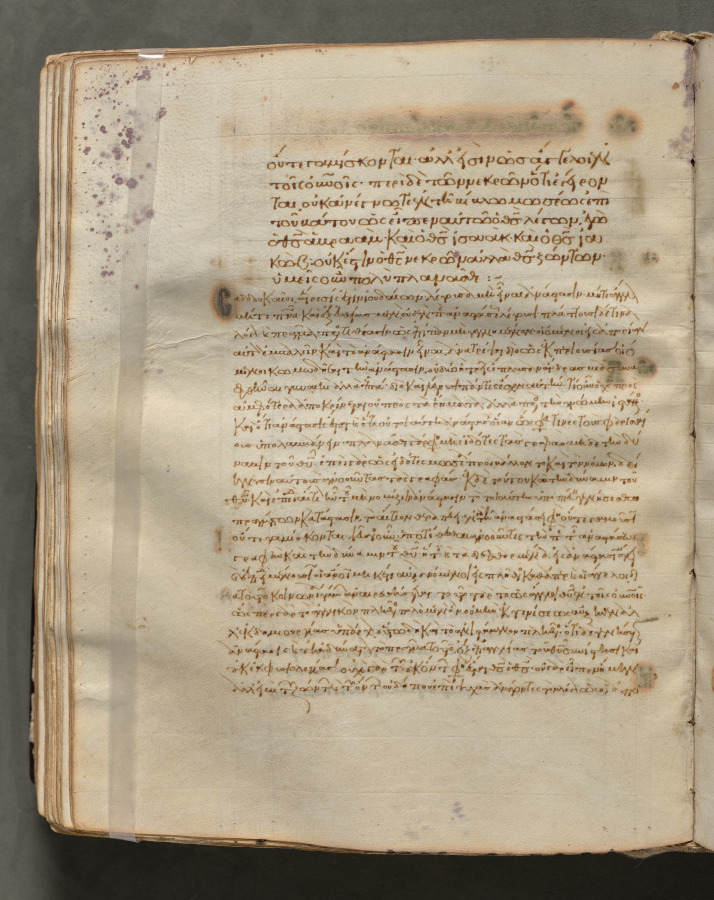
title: Text, folio 178 (verso), from a Gospel Book with Commentaries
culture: Byzantium, Constantinople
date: c. 1000–1100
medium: ink, tempera, and gold on vellum; leather binding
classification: Bound Volume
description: Each of the four gospels in this book opens on a page with brilliantly illuminated borders depicting the author of the text as well as birds-principally peacocks, symbols of the immortality of the soul-and fountains, representing the fountain of life and the salvation of the soul. This volume consists of 428 leaves with texts in Greek. Its level of sophistication suggests that it was probably written and decorated in a monastery in Constantinople.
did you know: Gospel Books were carried in procession through Byzantine churches.